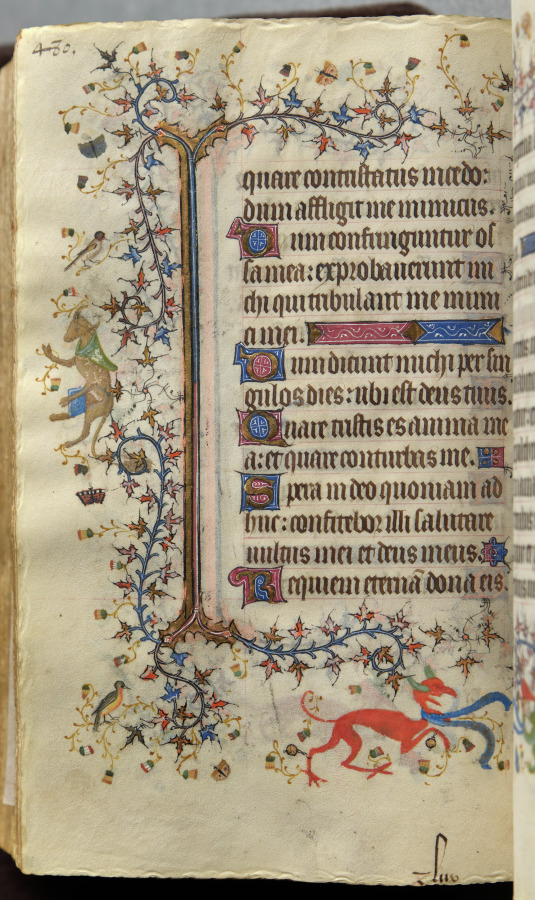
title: Hours of Charles the Noble, King of Navarre (1361-1425): fol. 234v, Text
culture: France, Paris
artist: Master of the Brussels Initials and Associates (French)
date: c. 1405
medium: ink, tempera, and gold on vellum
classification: Bound Volume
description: This precious volume was obviously highly prized by its owner, the French-born King of Navarre, who had his coat of arms painted on no less than twenty folios. Rather than directly commissioning this manuscript from a specific workshop, it seems that Charles the Noble acquired his book of hours -- perhaps ready-made for the luxury market -- while on a trip to Paris in 1404-05. A collaborative effort, six painting styles are evidenced within the pages of this codex, those of two Italians, two Frenchmen, and two Netherlanders. The painter who was responsible for the planning and decoration of the book, and who produced seventeen of the large miniatures, was a Bolognese artist known as the Master of the Brussels Initials. His principal assistant, responsible for most of the borders, was a Florentine who signed his name "Zecho" da Firenze on folio 208 verso.